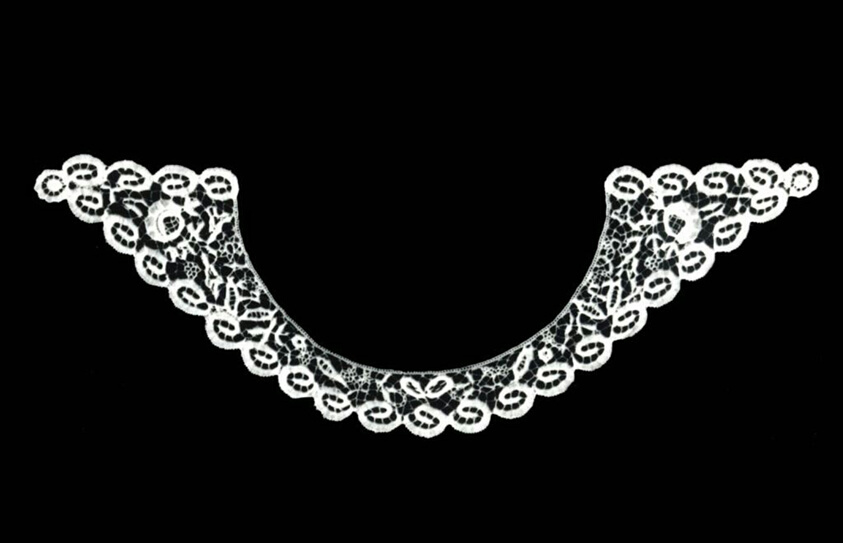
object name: Textile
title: Collar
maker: England, Honiton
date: 1855/65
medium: Cotton, bobbin part lace of a type known as "Honiton" with a plaited bar ground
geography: England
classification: textile; lace - bobbin